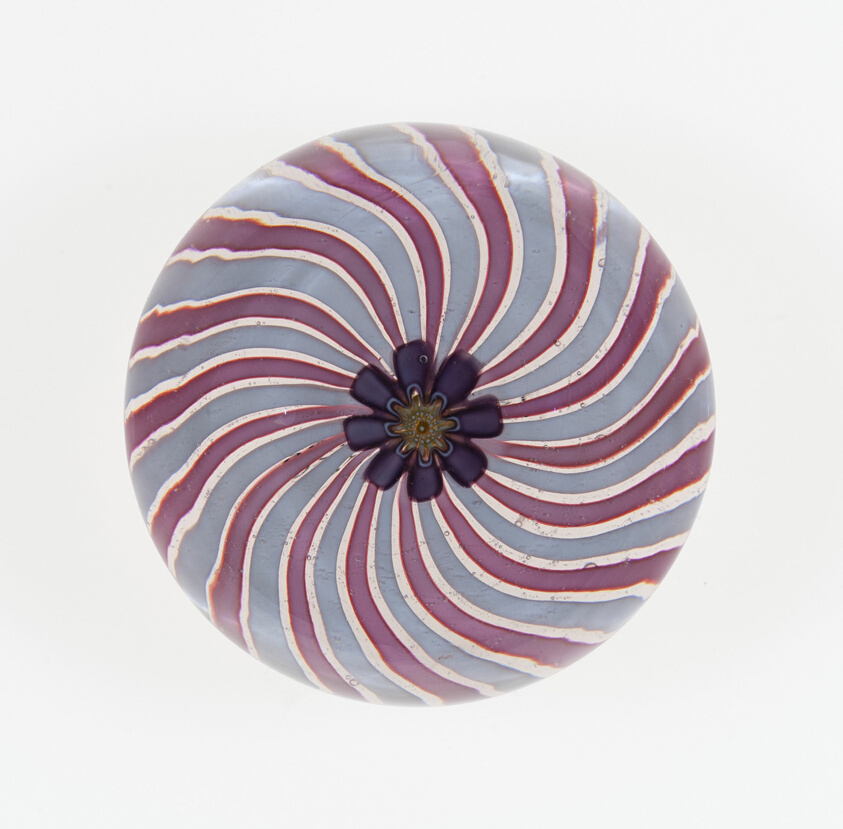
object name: Glass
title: Paperweight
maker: Clichy Glassworks (Cristalleries de Clichy); Clichy, France, 1837-1885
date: c. 1848–55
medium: Glass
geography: Clichy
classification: paperweight; glass